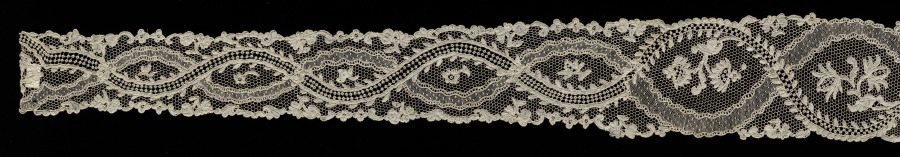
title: Lace Lappet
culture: France, Argentan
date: 1715–74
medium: Linen: needle lace (Point de Argentan)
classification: Lace